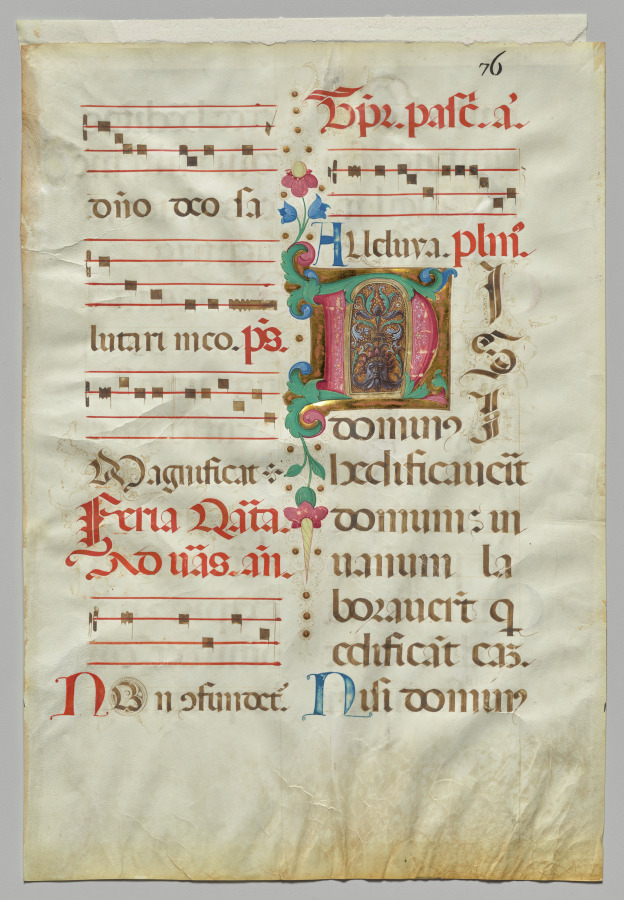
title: Leaf from an Antiphonary: Floral Initial (recto)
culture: Italy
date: c. 1475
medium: Ink, tempera, and gold on vellum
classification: Manuscript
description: The leaf comes from an Antiphonale, a liturgical book that contains the melodies and texts of all the chants of the Liturgy of the Hours, the antiphons. These include the psalms, responsories and hymns, which are arranged in the book in the order of the church year. The antiphons served clergymen and monks or nuns for their service in the choir stalls of the church.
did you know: Churches had mostly two copies of this book because the clergymen were sitting in the coir stall on both sides of the high altar and therefore needed a copy for each side.